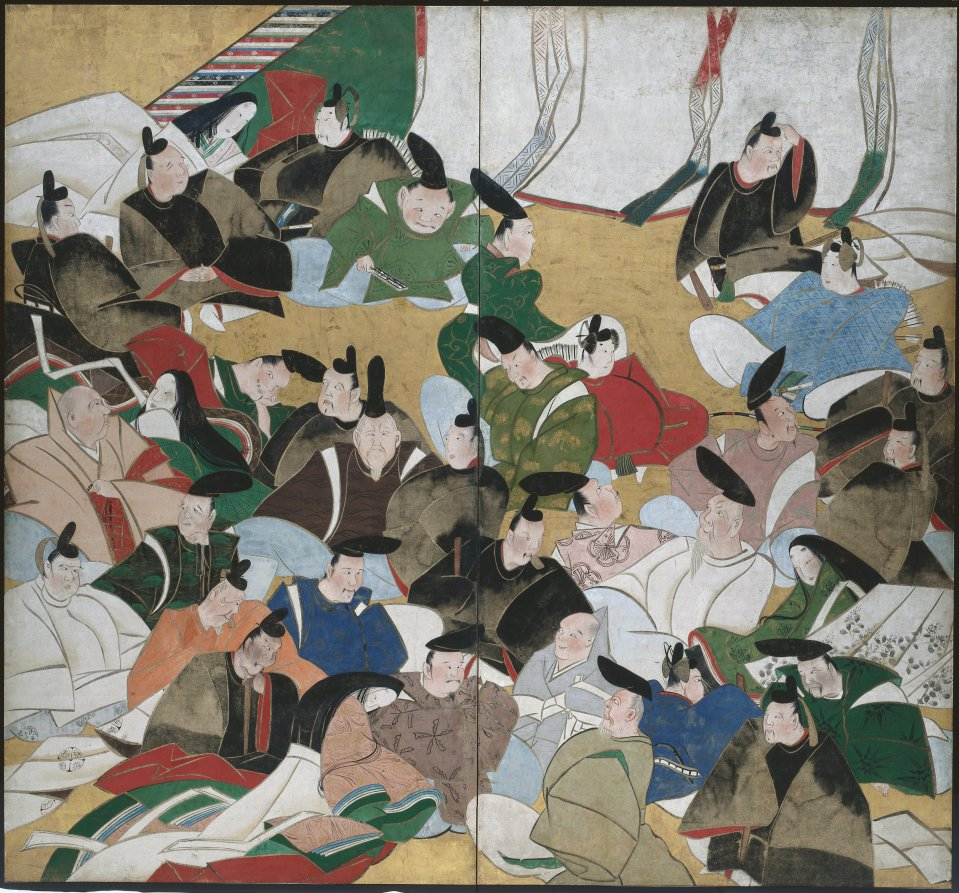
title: Thirty-Six Poetic Immortals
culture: Japan, Edo period (1615–1868)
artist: attributed to Tatebayashi Kagei (Japanese, active mid-1700s)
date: mid 1700s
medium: two-fold screen; ink, color, and gold on paper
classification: Painting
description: Fujiwara no Kintō (996–1075), a Japanese courtier, scholar, and poet, compiled select examples by the most celebrated composers of 31-syllable poems (waka) from the 600s to the 1000s. Painters soon made these “thirty-six poetic immortals” a favorite subject, traditionally presenting the poets in sequential, idealized portraits paired with their poems. In this interpretation, a chronologically impossible gathering of these great talents is in progress. The screen’s composition follows one devised by design virtuoso Ogata Kōrin (1658–1716).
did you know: The green surface edged with stripes at the upper left of the painting represents tatami matting with a silk border.